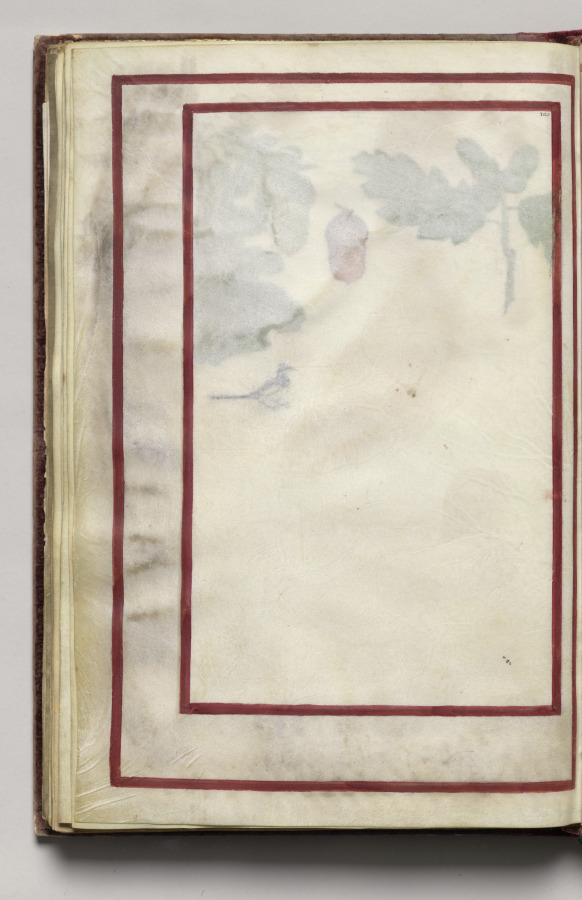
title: Border, folio 44 (verso), from Florilegium (A Book of Flower Studies)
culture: France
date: 1608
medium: watercolor, ink, silver and gold over occasional traces of pencil, on vellum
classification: Bound Volume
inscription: Dated: Poitiers 1608 (on frontispiece) Signed: On frontispiece in black ink, lower right: Van Kuyk Notation on drawing: Frontispiece: in pencil, lower margin: * élève de Van Kessel, peintre flammand (* in pencil also appears in front of Van Kuyk's name).